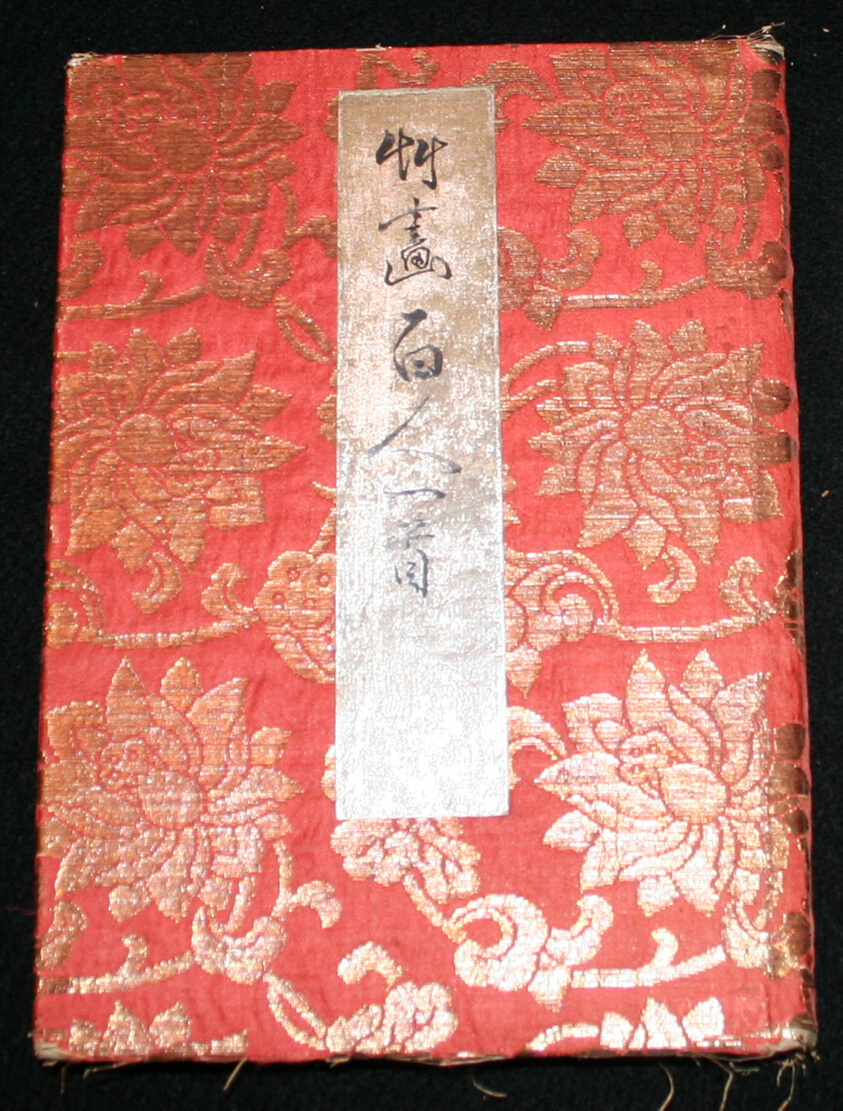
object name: Book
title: Portraits of One-hundred Poets (Soga hyakunin isshu) (0008)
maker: Seiyo (Senjai)(?); Japanese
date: 1851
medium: Book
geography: Japan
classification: book